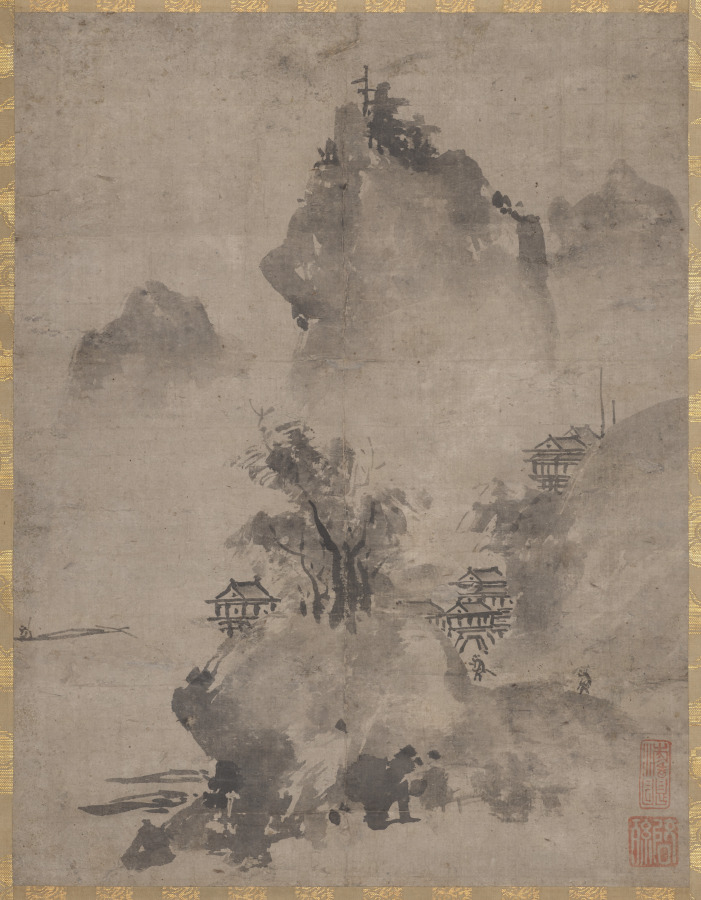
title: Coastal Landscape in the Haboku Style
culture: Japan, Muromachi period (1392–1573)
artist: Keison (Japanese, active late 15th to early 16th century)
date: late 1400s–early 1500s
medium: hanging scroll, ink on paper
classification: Painting